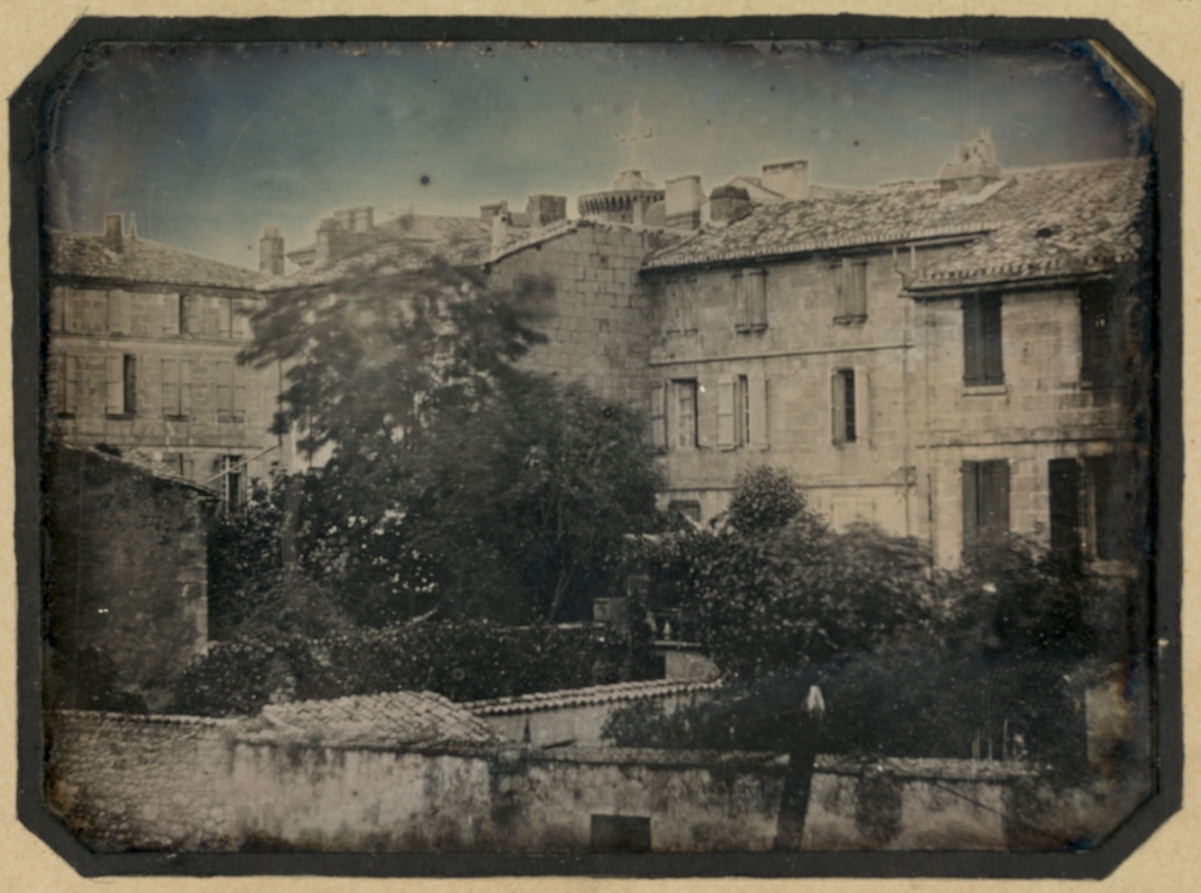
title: View of Angoulême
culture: France, 19th century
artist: Paul Michel Hossard (French, 1787–1862)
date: c. 1844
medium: daguerreotype, applied color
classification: Photograph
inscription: Written in pencil on verso: "HOSSARD"; Angoulême"; [additional writing in pencil is faded and unclear]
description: Paul Michel Hossard was an amateur daguerreotypist, especially noted for his architectural views. Rather than depicting a famous monument or landmark, this informal composition captures the charm of courtyards and houses in a small city in western France. The dominant horizontal lines of the buildings are contrasted with the soft, organic forms of the foliage. The presence of a breeze is suggested by the slight blurring of the tallest trees—the result of the long exposure time needed to make this image.